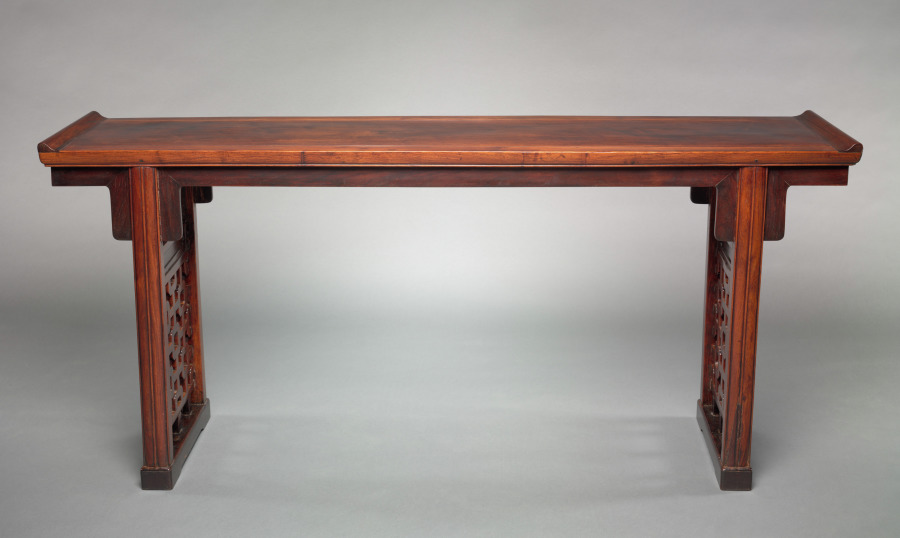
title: Altar Table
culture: China, Ming dynasty (1368–1644)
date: 1368–1644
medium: Rosewood (huanghuali)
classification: Furniture and woodwork